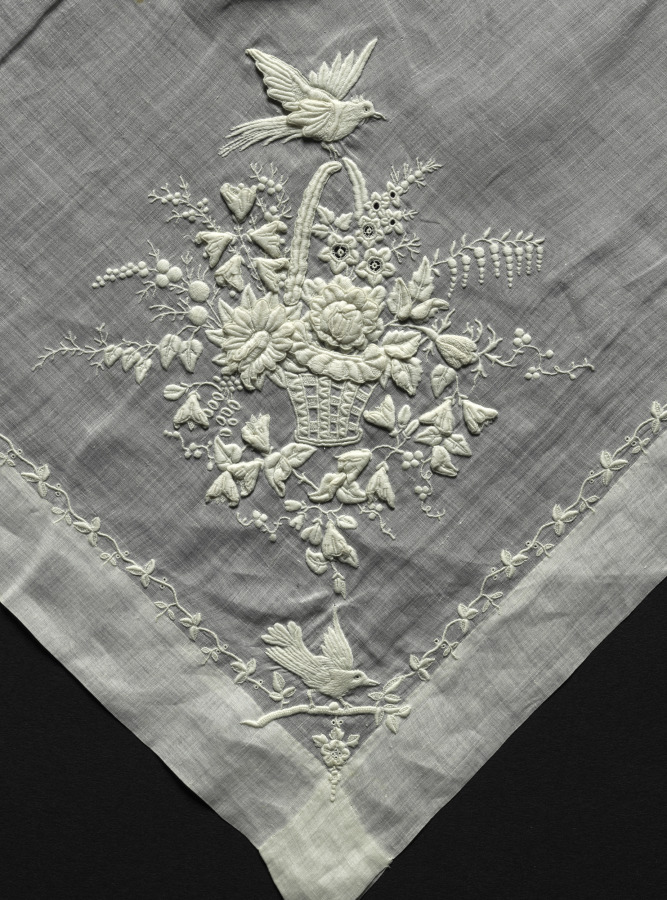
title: Handkerchief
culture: Switzerland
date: 1800s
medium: Plain weave linen: raised embroidery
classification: Embroidery